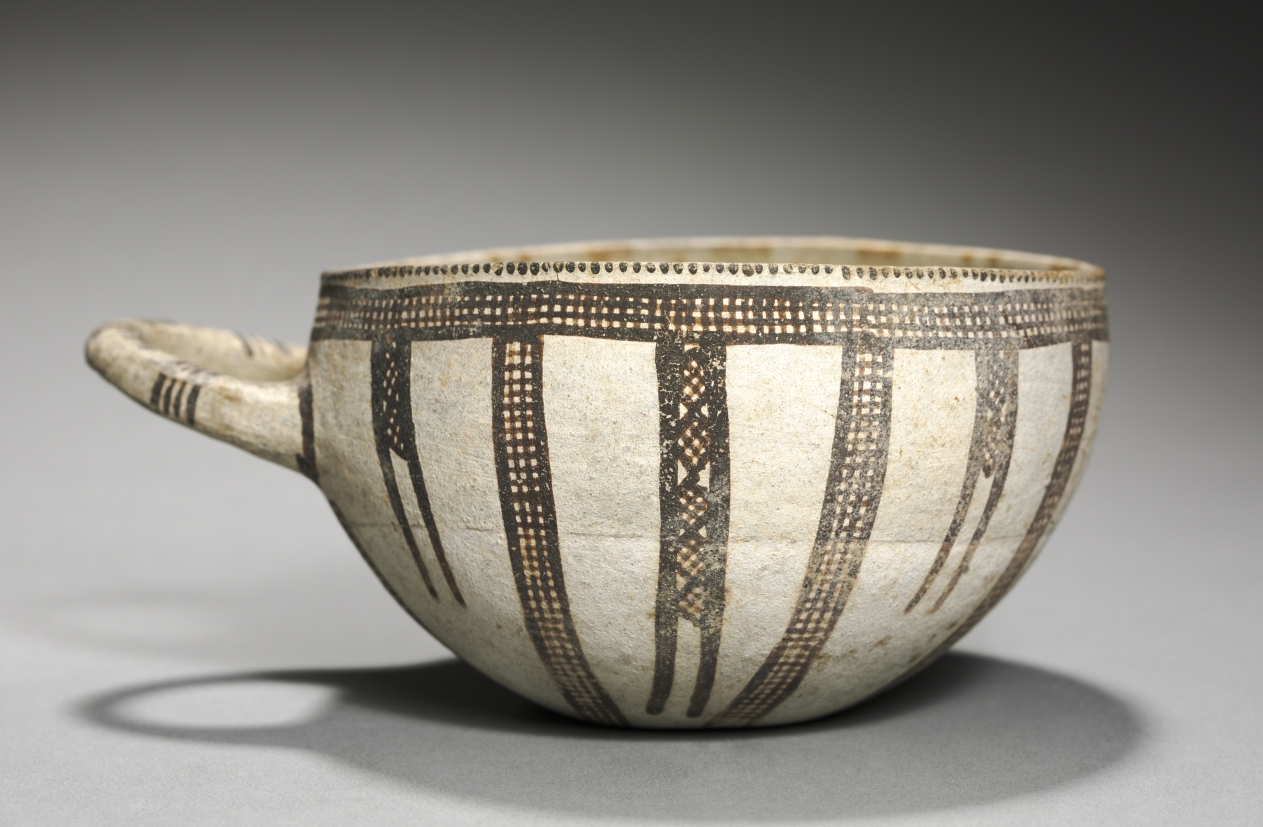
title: One-Handled Bowl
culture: Cyprus, late Cypriot II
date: c. 1450–1200 BCE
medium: white slip ware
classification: Ceramic